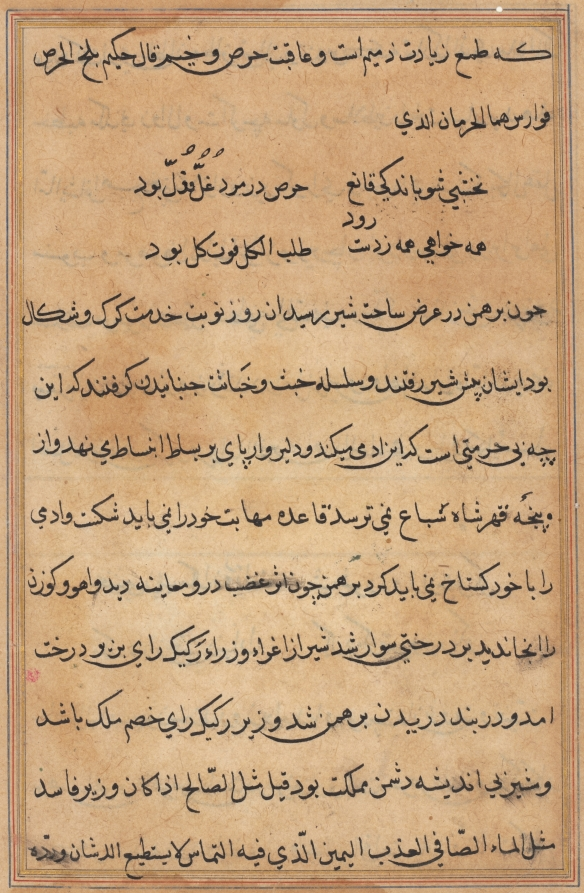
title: Page from Tales of a Parrot (Tuti-nama): text page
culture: Mughal India, court of Akbar (reigned 1556–1605)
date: c. 1560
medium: gum tempera, ink, and gold on paper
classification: Painting